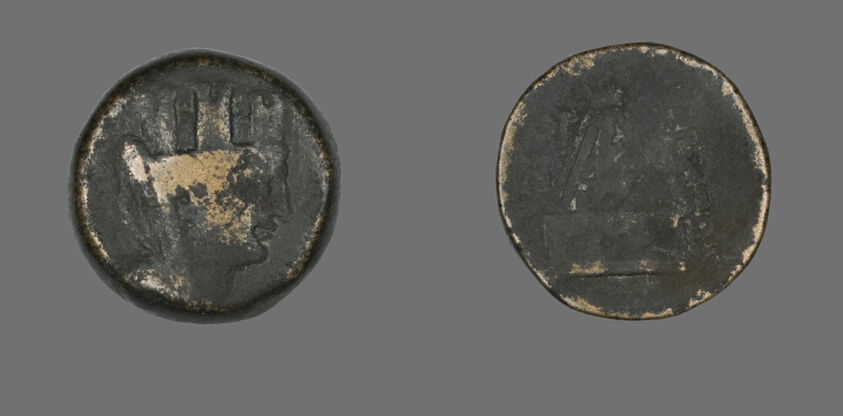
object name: Coin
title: Coin Depicting the Goddess Tyche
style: greek, ancient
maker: Greek; Tarsus, Cilicia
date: 2nd-1st century BCE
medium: Bronze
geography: Ancient Greece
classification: coin; ancient art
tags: goddesses